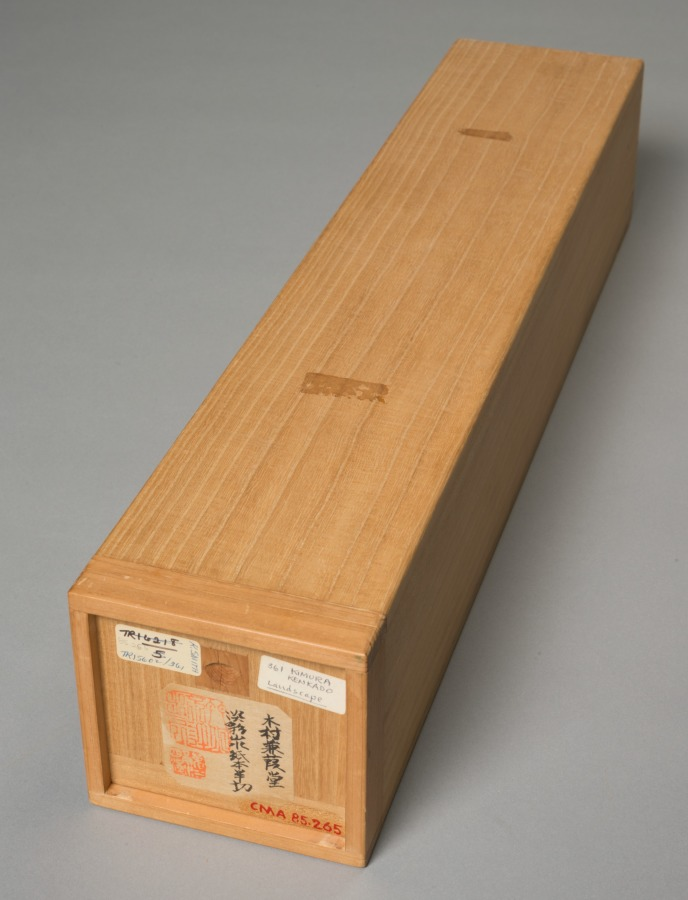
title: Landscape with Boaters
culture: Japan, Edo period (1615–1868)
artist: Kimura Kenkadō (Japanese, 1736–1802)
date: late 1700s–early 1800s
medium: hanging scroll; ink and slight color on paper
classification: Painting